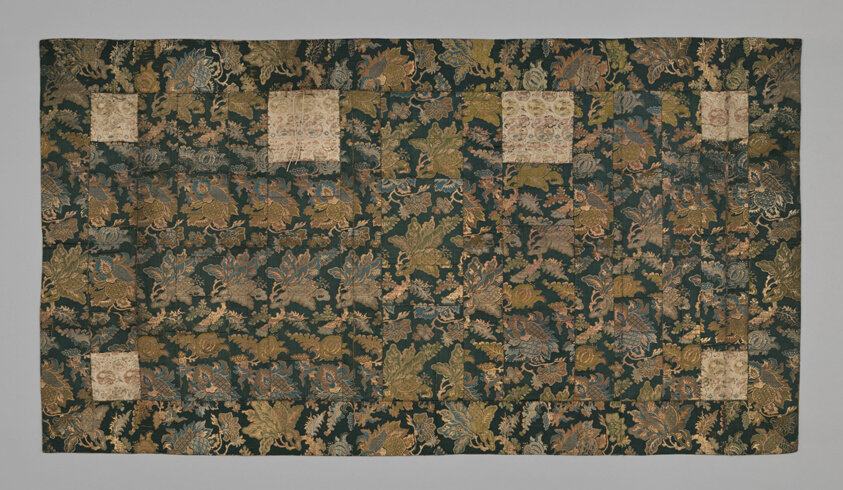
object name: Textile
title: Kesa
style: edo (japanese period)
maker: Japan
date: late Edo period (1789–1868), late 18th/early 19th century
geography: Japan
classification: textile; costume; liturgical - buddhist; weaving